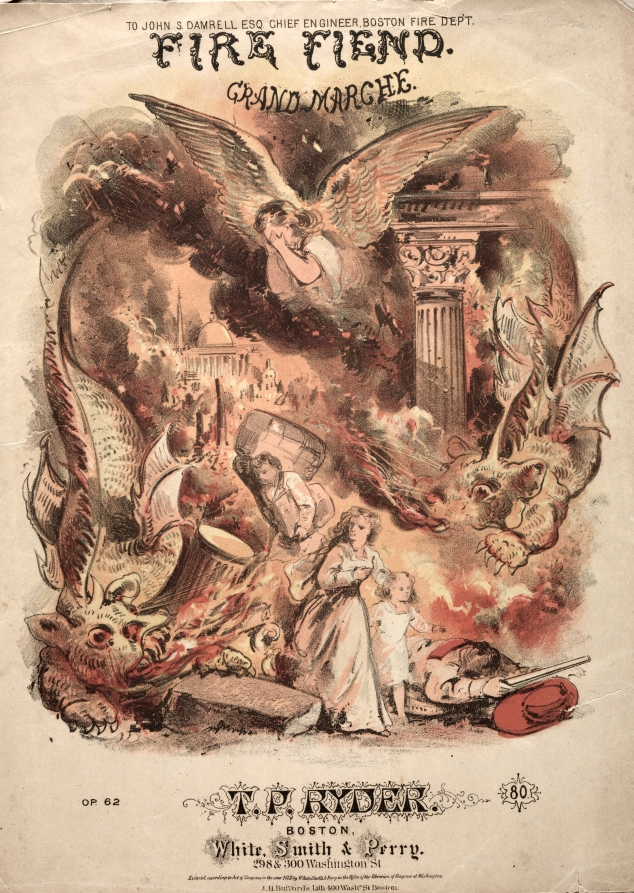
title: Fire Fiend - Sheet Music Cover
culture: America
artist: Winslow Homer (American, 1836–1910)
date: c. 1872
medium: lithograph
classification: Print